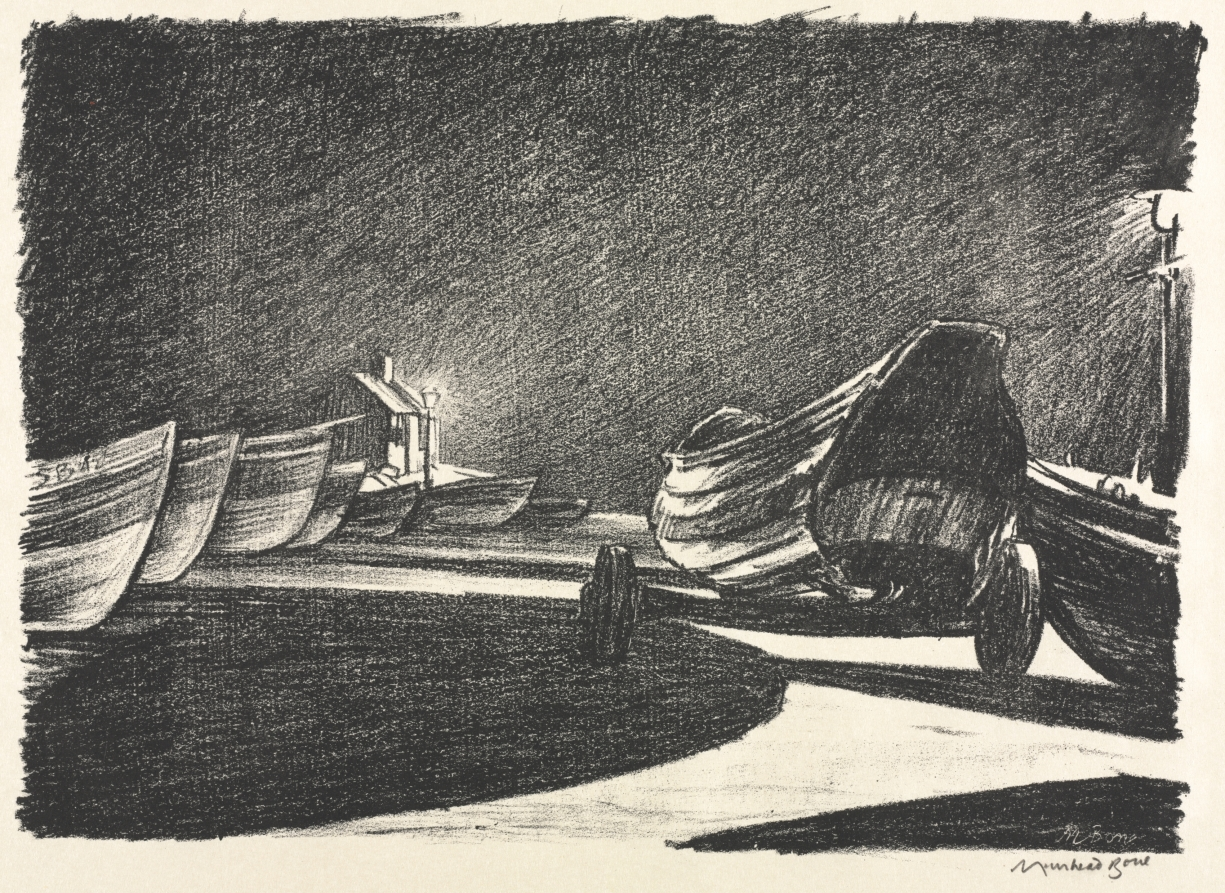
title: Night at Filey, East Riding, Yorkshire, England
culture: England, 20th century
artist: Muirhead Bone (British, 1876–1953)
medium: lithograph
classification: Print